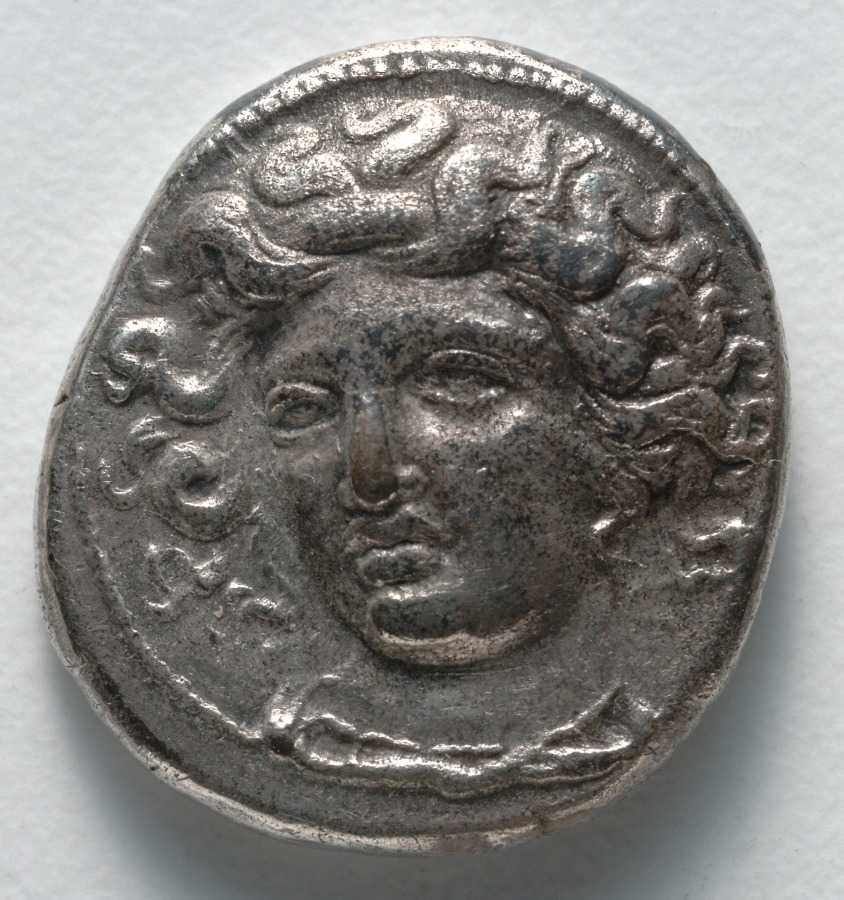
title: Drachm: Head of Larissa (Nymph) (obverse); Horse (reverse)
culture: Greek, minted at Larissa (Thessalia)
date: c. 375–320 BCE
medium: silver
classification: Coins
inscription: ΛΑΡΙ | ΣΑΙΩΝ